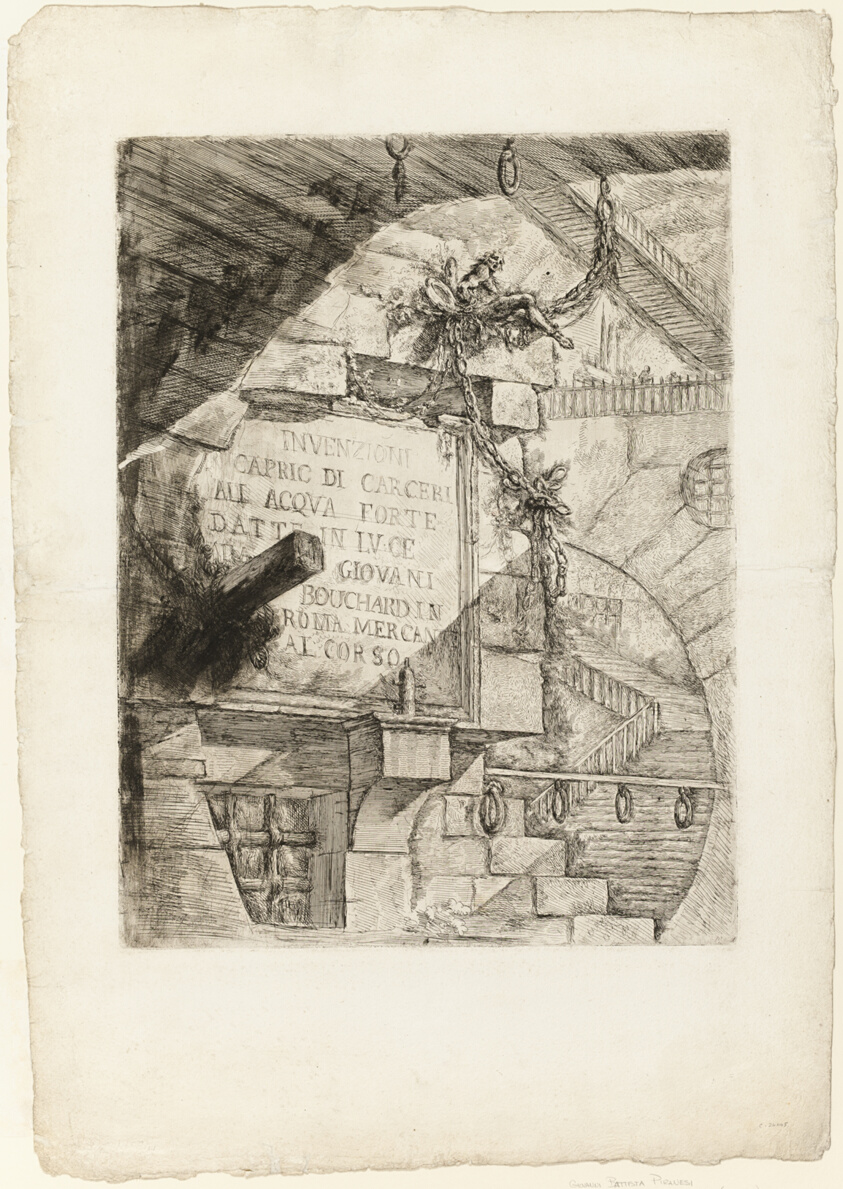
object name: Print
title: Title Page from Imaginary Prisons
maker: Giovanni Battista Piranesi (Italian, 1720-1778)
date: 1750–60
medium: Etching and engraving on heavy ivory laid paper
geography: Italy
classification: etching; print; prints and drawing